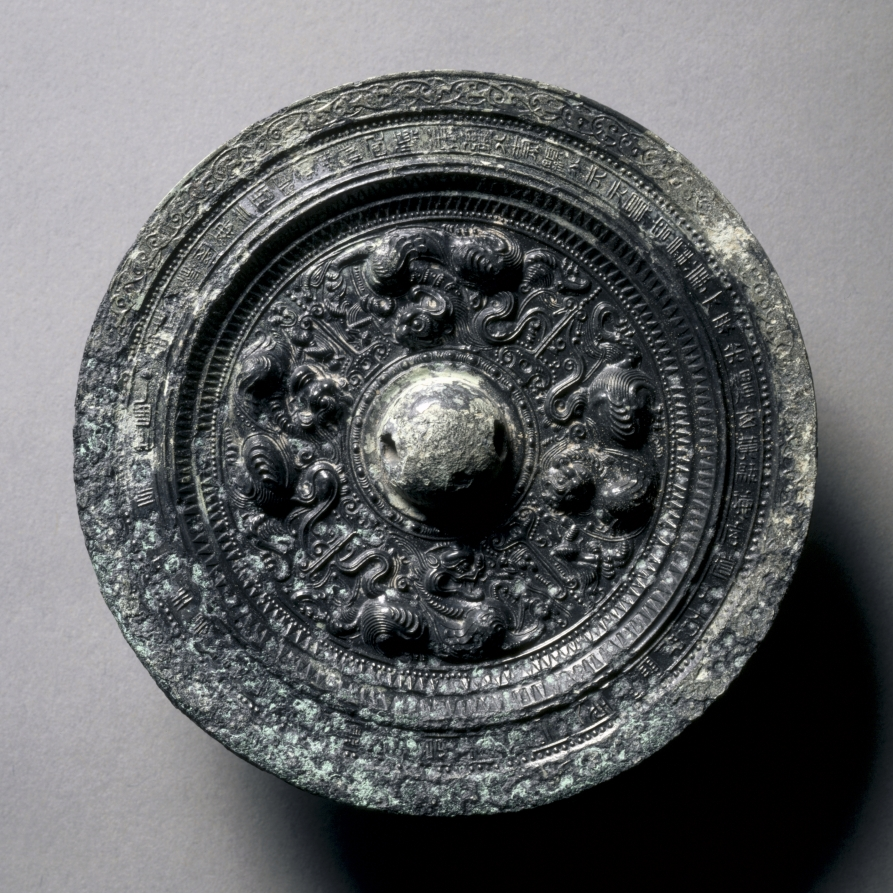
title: Mirror with Four Bixie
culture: China, Southern and Northern Dynasties period (386-589)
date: early 400s–late 500s CE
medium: bronze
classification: Metalwork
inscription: 吾作明鏡，幽涑三商。 雕刻典祚，配德萬疆。 人氣顯分，天元景容。座事六采， 光耀玄黃。統德序道，【】有紀綱 ...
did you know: A bixie is a fantastical hybrid creature that was believed to ward off evil spirits